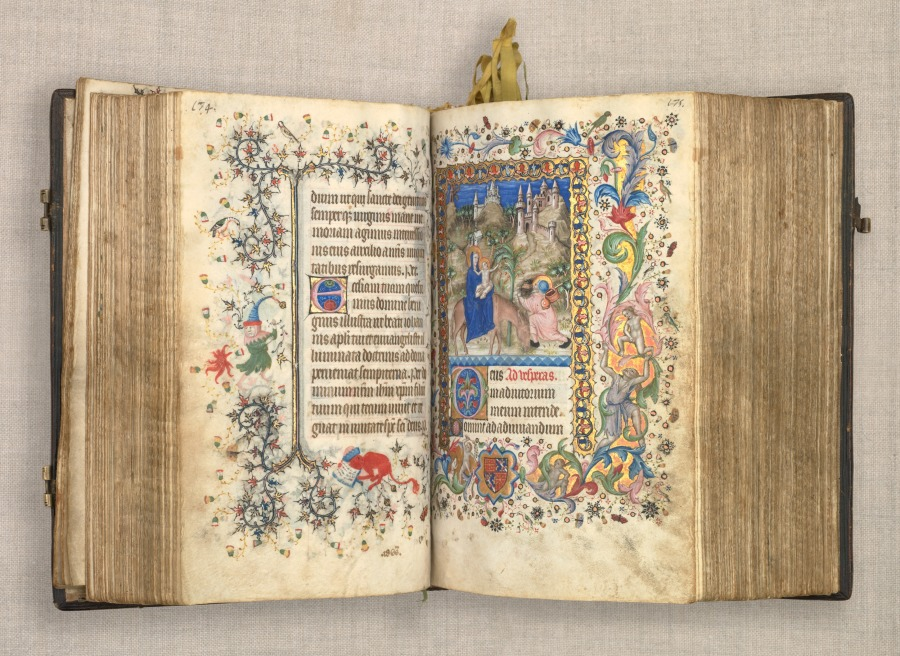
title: Hours of Charles the Noble, King of Navarre (1361-1425): fol. 87v, Text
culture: France, Paris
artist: Master of the Brussels Initials and Associates (French)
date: c. 1405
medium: ink, tempera, and gold on vellum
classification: Bound Volume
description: This precious volume was obviously highly prized by its owner, the French-born King of Navarre, who had his coat of arms painted on no less than twenty folios. Rather than directly commissioning this manuscript from a specific workshop, it seems that Charles the Noble acquired his book of hours -- perhaps ready-made for the luxury market -- while on a trip to Paris in 1404-05. A collaborative effort, six painting styles are evidenced within the pages of this codex, those of two Italians, two Frenchmen, and two Netherlanders. The painter who was responsible for the planning and decoration of the book, and who produced seventeen of the large miniatures, was a Bolognese artist known as the Master of the Brussels Initials. His principal assistant, responsible for most of the borders, was a Florentine who signed his name "Zecho" da Firenze on folio 208 verso.